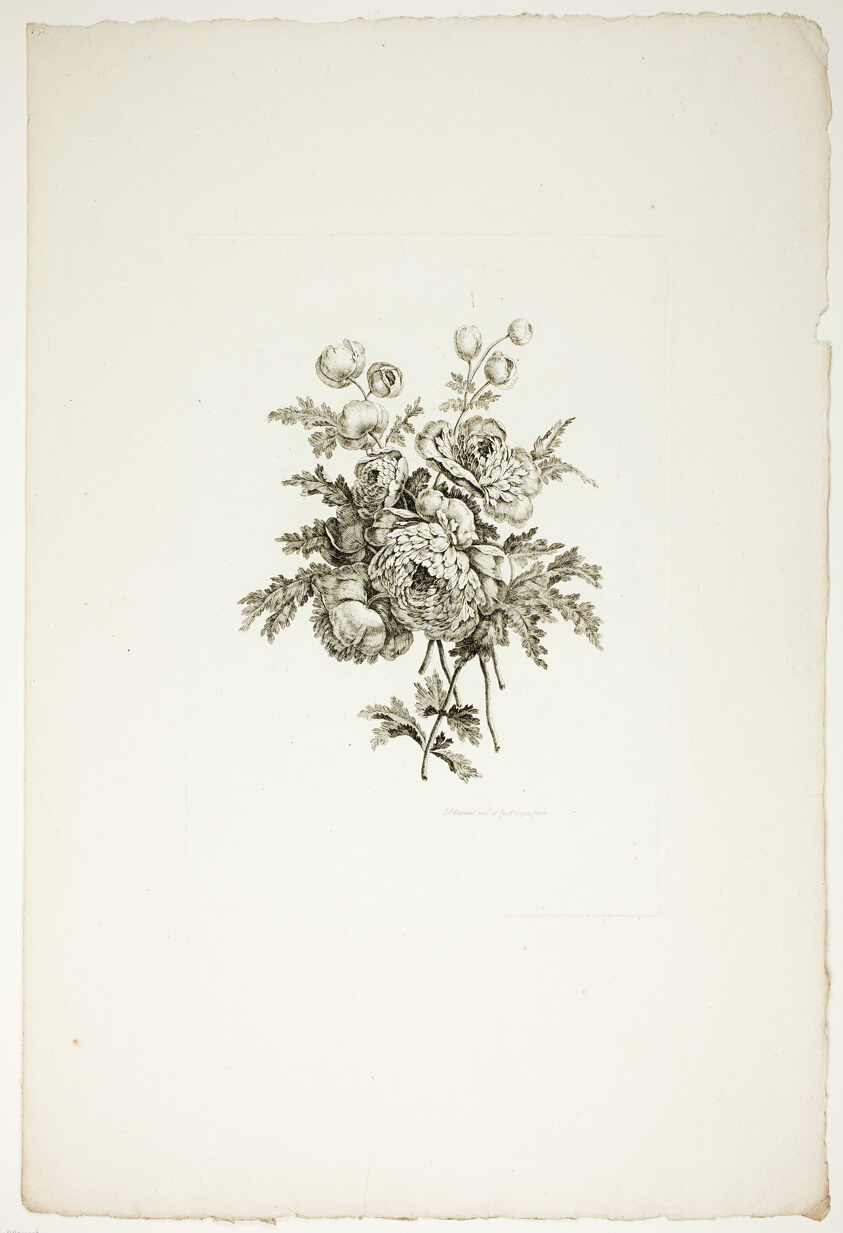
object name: Print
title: Bouquet with Peonies, from Collection of Different Bouquets of Flowers, Invented and Drawn by Jean Pillement and Engraved by P. C. Canot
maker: Pierre-Charles Canot (French, 1710-1777); after Jean-Baptiste Pillement (French, 1728-1808); published by Charles Leviez (French, 1708-1778)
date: published July 4, 1760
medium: Etching on ivory laid paper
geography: France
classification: etching; print; prints and drawing